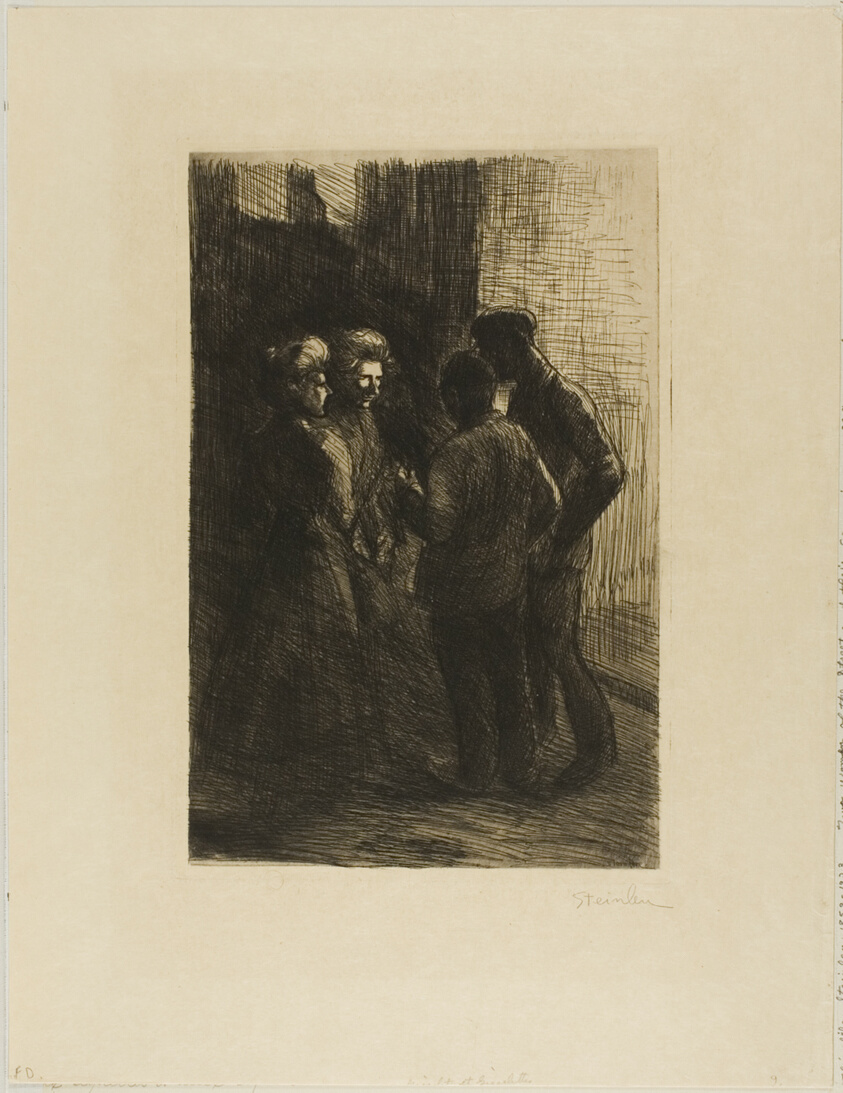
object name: Print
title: Two Women of the Street and Their Companions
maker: Théophile-Alexandre Steinlen; French, born Switzerland, 1859-1923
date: 1898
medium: Etching from a zinc plate on cream wove paper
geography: France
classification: etching; print; prints and drawing